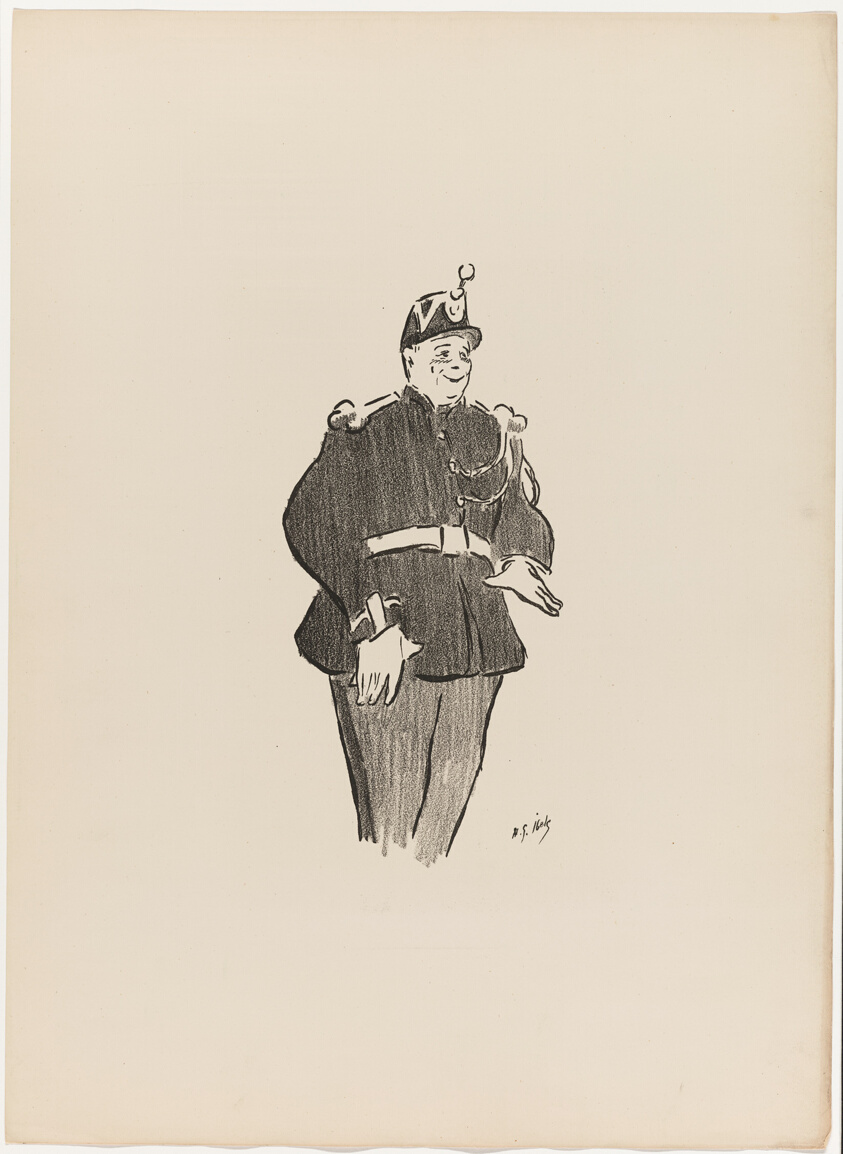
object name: Print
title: Polin, from Le Café-Concert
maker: Henri-Gabriel Ibels (French, 1867-1936); printed by Edward Ancourt & Cie (French, 19th-20th century); published by L'Estampe originale (French, 1893-1895)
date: 1893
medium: Lithograph on cream wove paper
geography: France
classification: lithograph; print; prints and drawing